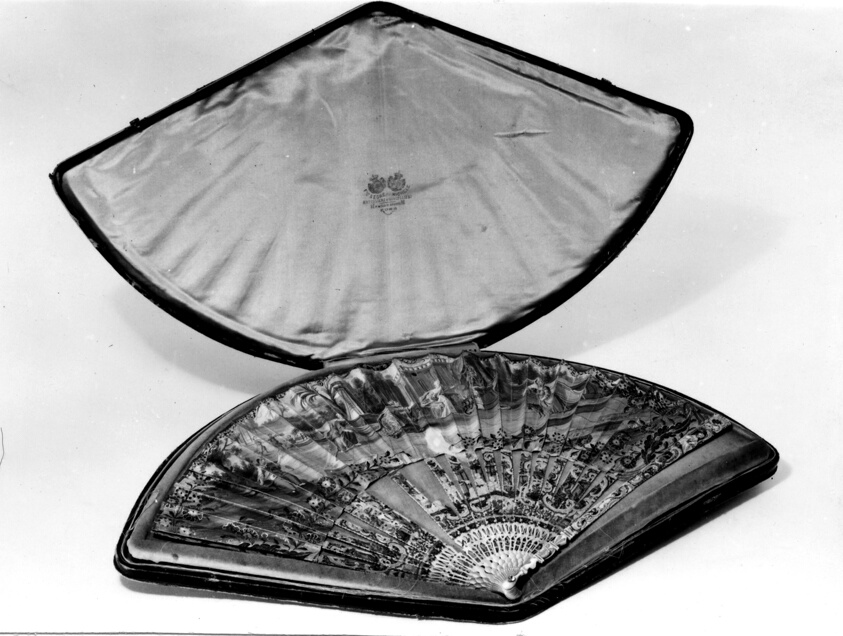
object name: Costume and Accessories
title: Fan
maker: France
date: c. 1803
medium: Paper mount; painted ivory sticks; leather case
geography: France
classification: textile; fan - paper; costume accessory - folding fan; costume